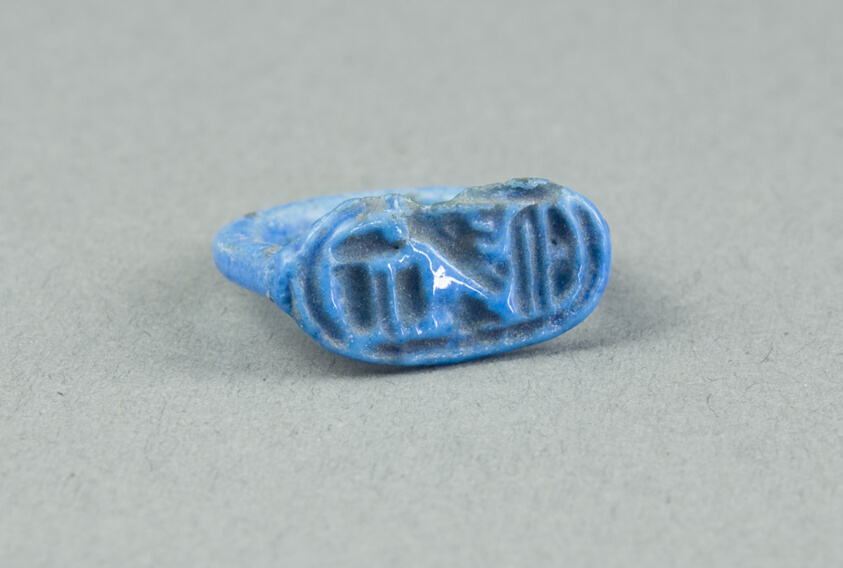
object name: Costume and Accessories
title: Ring: Horemheb, Beloved of Amon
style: eighteenth dynasty, new kingdom, egyptian, ancient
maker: Egyptian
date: New Kingdom, Dynasty 18, reign of Horemheb (about 1323–1295 BCE)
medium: Faience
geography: Egypt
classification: ring (jewelry); ceramics; jewelry; ancient art; costume; faïence (composite material)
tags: Hieroglyphs